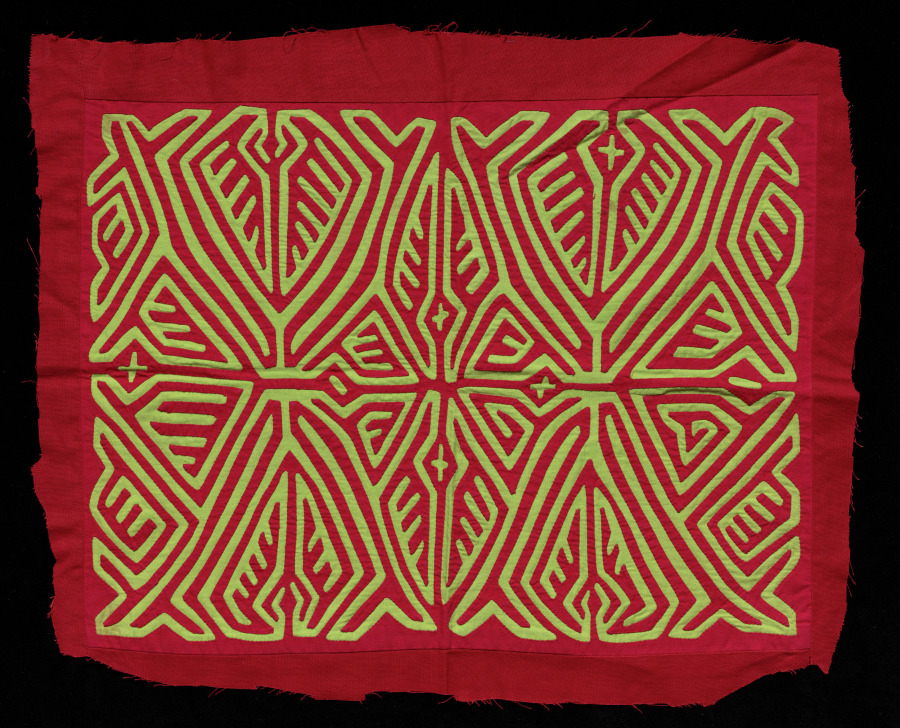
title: Labyrinth Mola Panel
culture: Republic of Panamá, Gunayala Comarca, Guna people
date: before 1960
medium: Cotton; reverse appliqué, appliqué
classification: Garment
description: This Labyrinth Mola Panel is executed in one of the most prestigious of Guna mola-making techniques. Known as bisu-bisu, it is a geometric maze of evenly spaced lines that create winding paths across the surface and visually dissolve the divide between figure and ground.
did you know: Panels like this one originally were sewn into blouses known as molas.